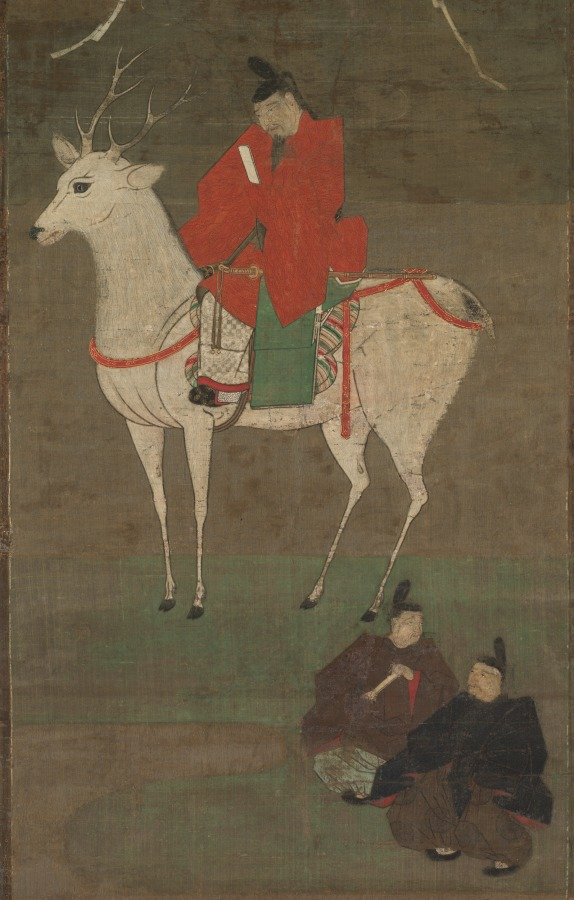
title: Departure from Kashima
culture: Japan, Nanbokuchō period (1336–92)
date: 1336–92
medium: hanging scroll; ink and color on silk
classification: Painting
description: The kami Takemikazuchi from Kashima (in present-day Ibaraki Prefecture) departs on a white deer for Mount Mikasa in Nara, where he takes up residence. The five Kasuga kami are presented within a golden circle supported by the branches of a sakaki tree, from which trail five white paper streamers—indicating the purity and sacredness of the five shrine halls of the complex—as well as blossoming wisteria vines, a symbol of the Fujiwara family. The two figures walking along near the stag’s back legs are Nakatomi no Tokifū and his younger brother Hidetsura, who have followed Takemikazuchi and become priests of Kasuga Taisha.